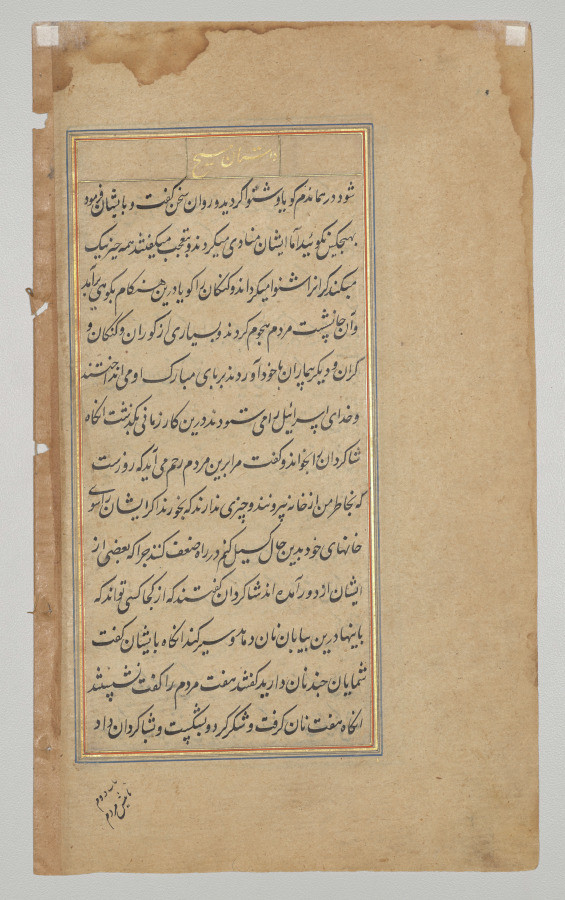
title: Jesus being awakened during a tempest on the Sea of Galilee (folio 77 recto), from a Mirror of Holiness (Mir’at al-quds) of Father Jerome Xavier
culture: Mughal India, Allahabad, made for Prince Salim (1569–1627)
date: 1602–4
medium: Gum tempera, ink, color, and gold on paper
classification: Manuscript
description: The boat carrying Jesus and his apostles encountered a tempest on the Sea of Galilee. As the apostles began to panic and fear that their boat would sink, Jesus continued to sleep peacefully. The painter illustrates the moment before Jesus was awakened by his apostles, who are frightened by the storm and perhaps also by the crocodile that sticks its head out of the waves. The power of the gale is indicated by the violently twisting sail and the Mughal-style tassel that swings at the top of the mast. This composition is the only one in the Cleveland manuscript to be based on an identifiable European print.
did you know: The apostle wearing green appears to be seasick.